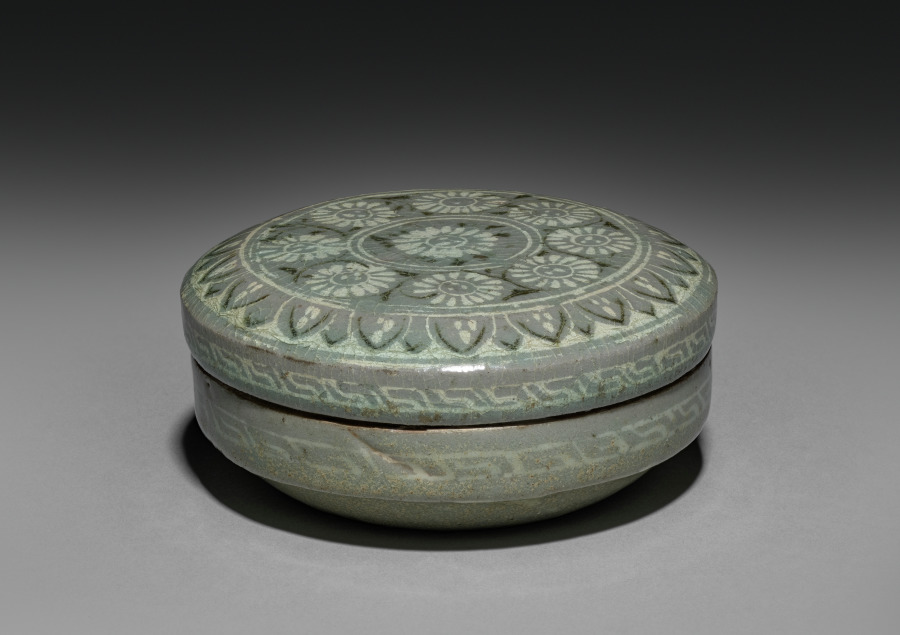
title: Box and Cover with Inlaid Phoenix Design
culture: Korea, Goryeo dynasty (918–1392)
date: 918–1392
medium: earthenware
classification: Ceramic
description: Celadons, spoons, seals, and bronze mirrors were the most common burial objects in tombs during the Goryeo period (918–1392). Once used to contain colored powder, rouge, and eyebrow gel for makeup, this small container was one of the standard goods that furnished elites' tombs. Both women and men used the grain powder of rice or millet for whitening their skin, safflower extract for rouge, and plant ash or soot for eyebrow gel. Yet, natural-looking makeup seems to have been the most favorable one in Korea according to the travelogue by Xu Jing (1091–1153), the Chinese diplomat who visited Korea in 1123.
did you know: This lidded ceramic container was used to store either incense or cosmetics.